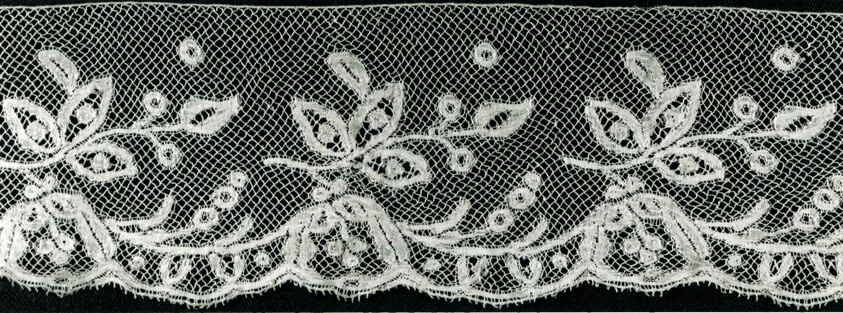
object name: Textile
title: Border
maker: Belgium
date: 1865/85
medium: Cotton, bobbin straight lace of a type known as "Valenciennes" with a square Valenciennes mesh ground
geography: Belgium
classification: textile; lace - bobbin